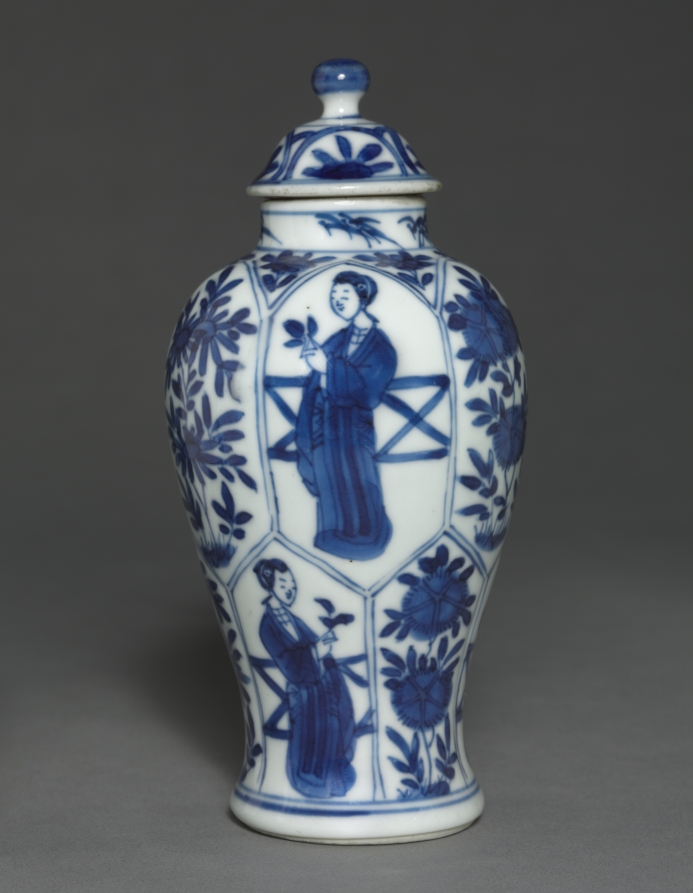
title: Jar with Cover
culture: China, Qing dynasty (1644-1911)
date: 19th Century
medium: porcelain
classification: Ceramic